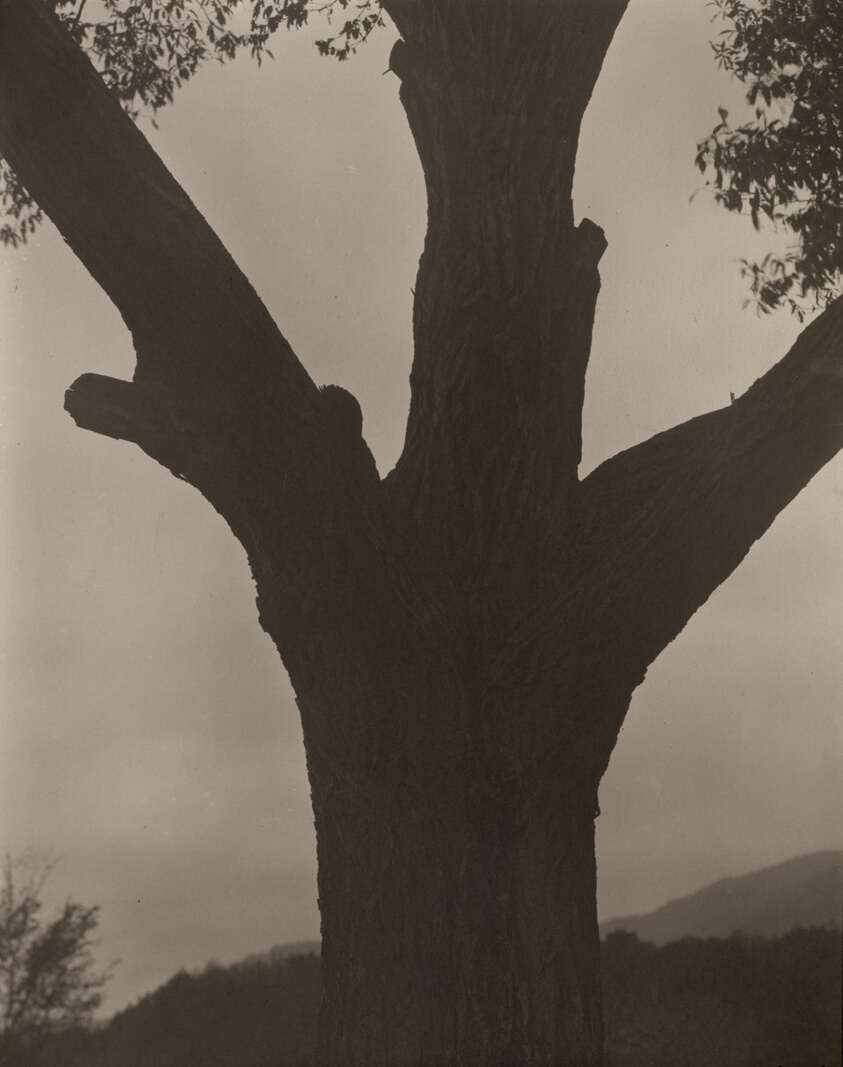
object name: Photograph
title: The Dying Chestnut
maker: Alfred Stieglitz (American, 1864–1946)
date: 1919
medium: Gelatin silver print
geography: United States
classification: gelatin silver (developing-out-paper) pr; photographic process; photography; photograph